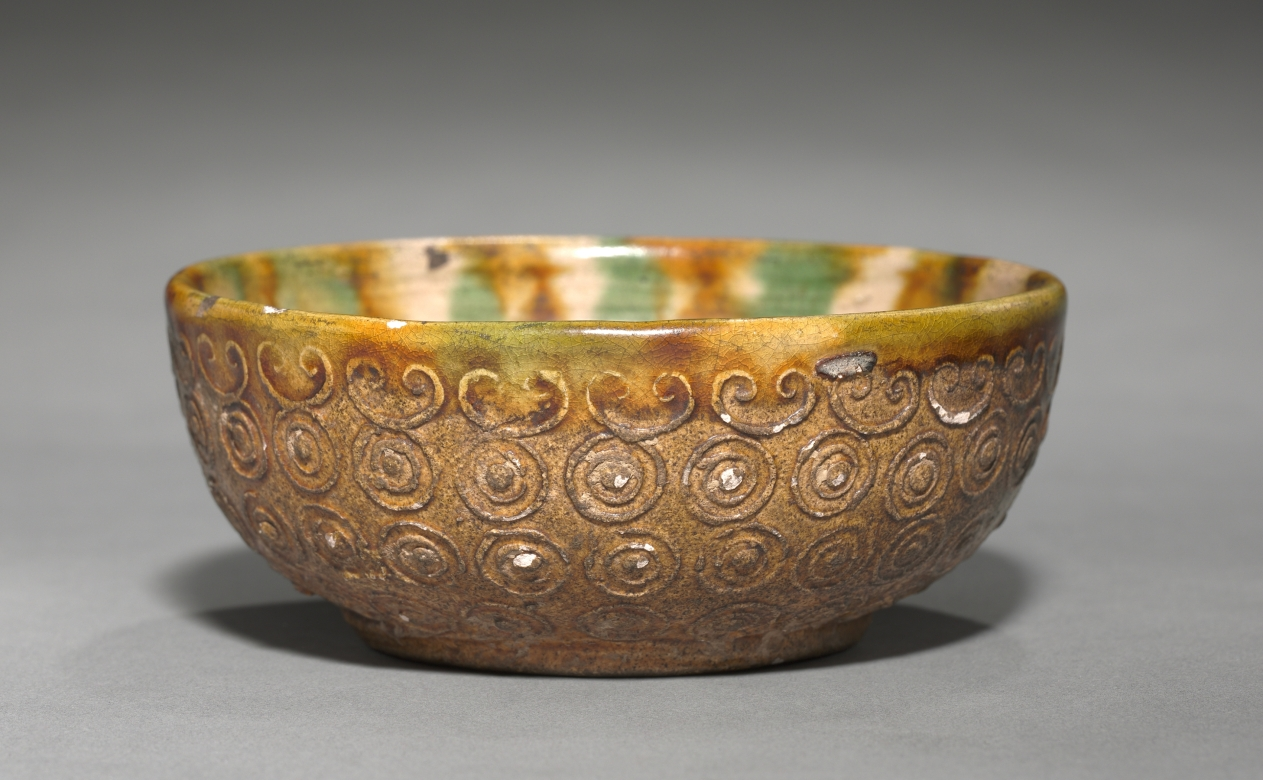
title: Bowl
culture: China, Tang dynasty (618-907)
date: 618–906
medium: glazed earthenware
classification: Ceramic